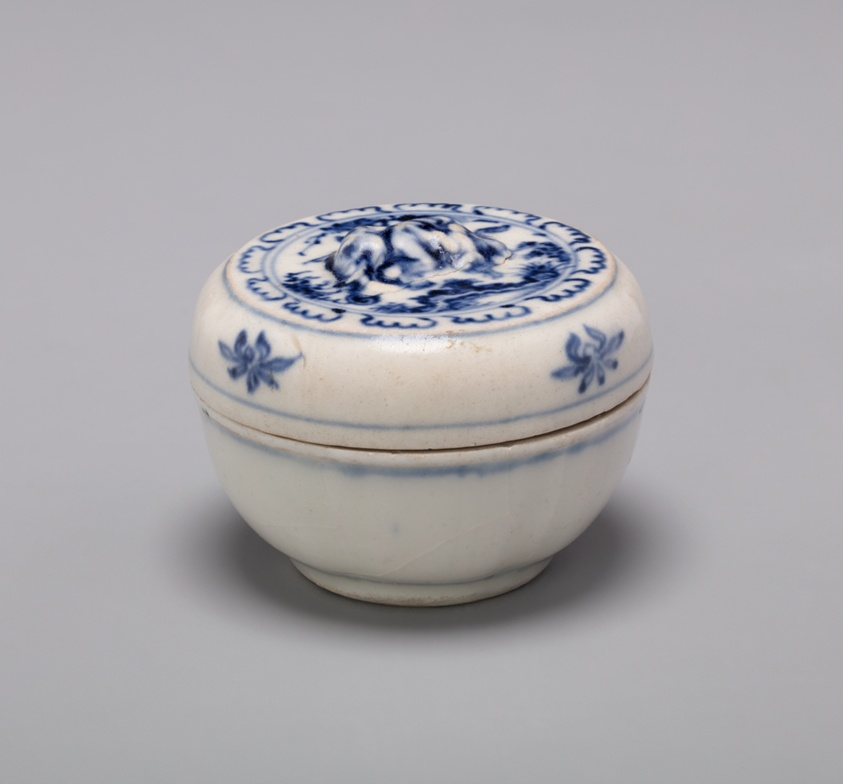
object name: Vessel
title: Miniature Covered Box with Knob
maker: Vietnam, near Hoi An, Offshore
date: Late 15th/early 16th century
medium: Glazed stoneware with cobalt-blue underglaze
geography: Vietnam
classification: miniature; vessel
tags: blue (color)